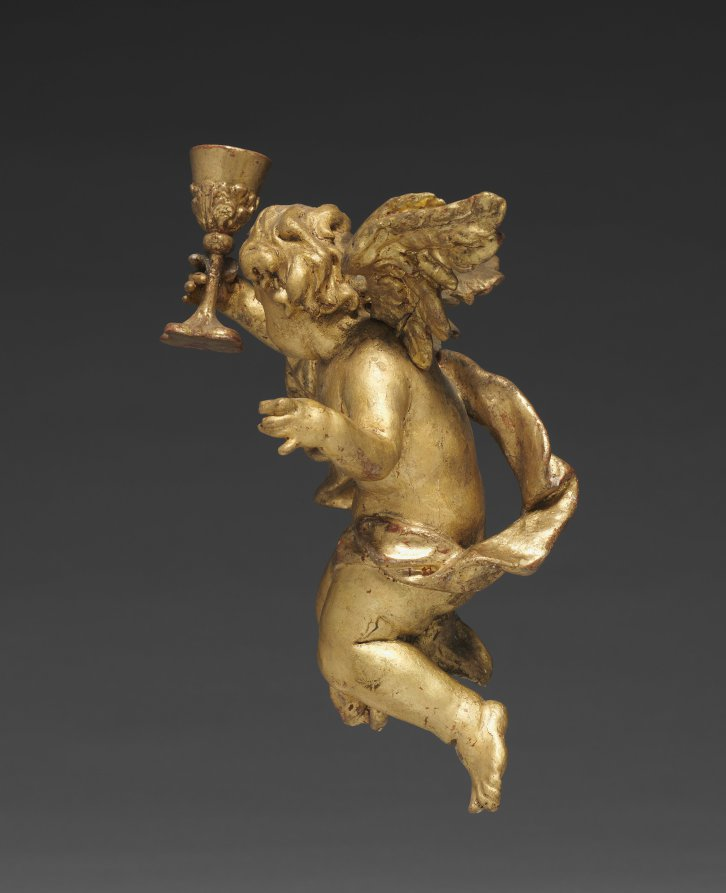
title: Altarpiece with Relics - Putto, middle right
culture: Germany, Bavaria, 18th century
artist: Joseph Matthias Götz (German, 1696–1760)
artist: and Workshop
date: c. 1735–40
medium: gilded wood, with relics in niches: gilded wood, mother-of-pearl, ebony, red silk, gold wire, seed pearls, rock crystal, pen and ink on paper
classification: Sculpture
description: Götz covers every surface in gold leaf, giving each part of the object equal importance, rather than simply framing a central picture. In this distinctively Central European approach, figural narrative is subordinate to the overall ensemble. Götz designed this object to rest on top of an altar, probably in front of a larger painted or sculpted decorative scheme. The work contains relics seen through the small windows on the perimeter. These small remains of holy figures demonstrate the persistence of a medieval Catholic tradition well into the 1700s.